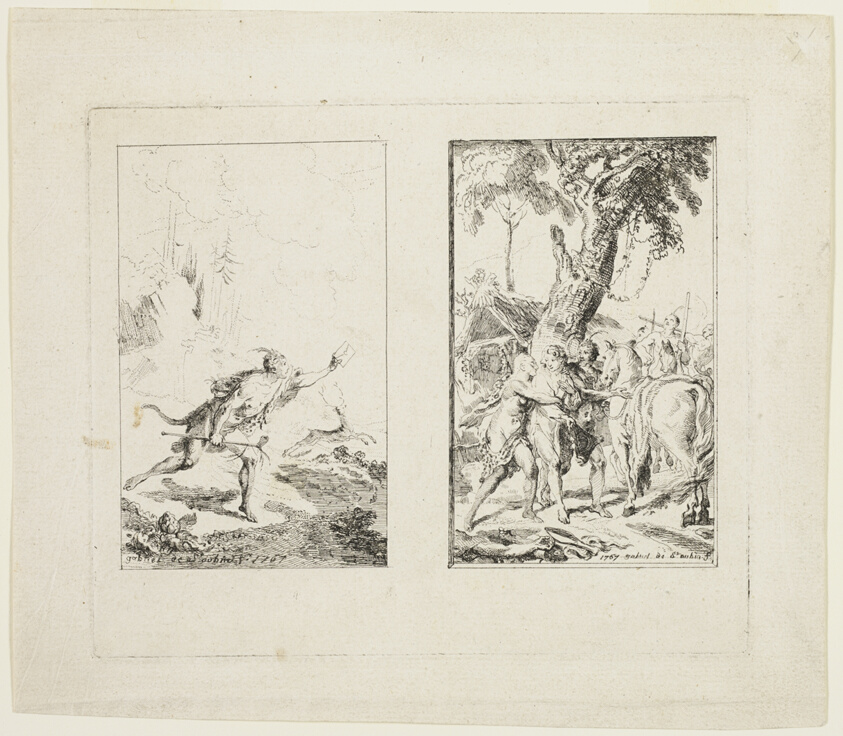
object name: Print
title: Vignettes for the "New Voyages to the West Indies" by the Chevalier Bossu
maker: Gabriel Jacques de Saint-Aubin (French, 1724–1780)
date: 1767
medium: Etching on ivory laid paper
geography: France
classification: etching; print; prints and drawing